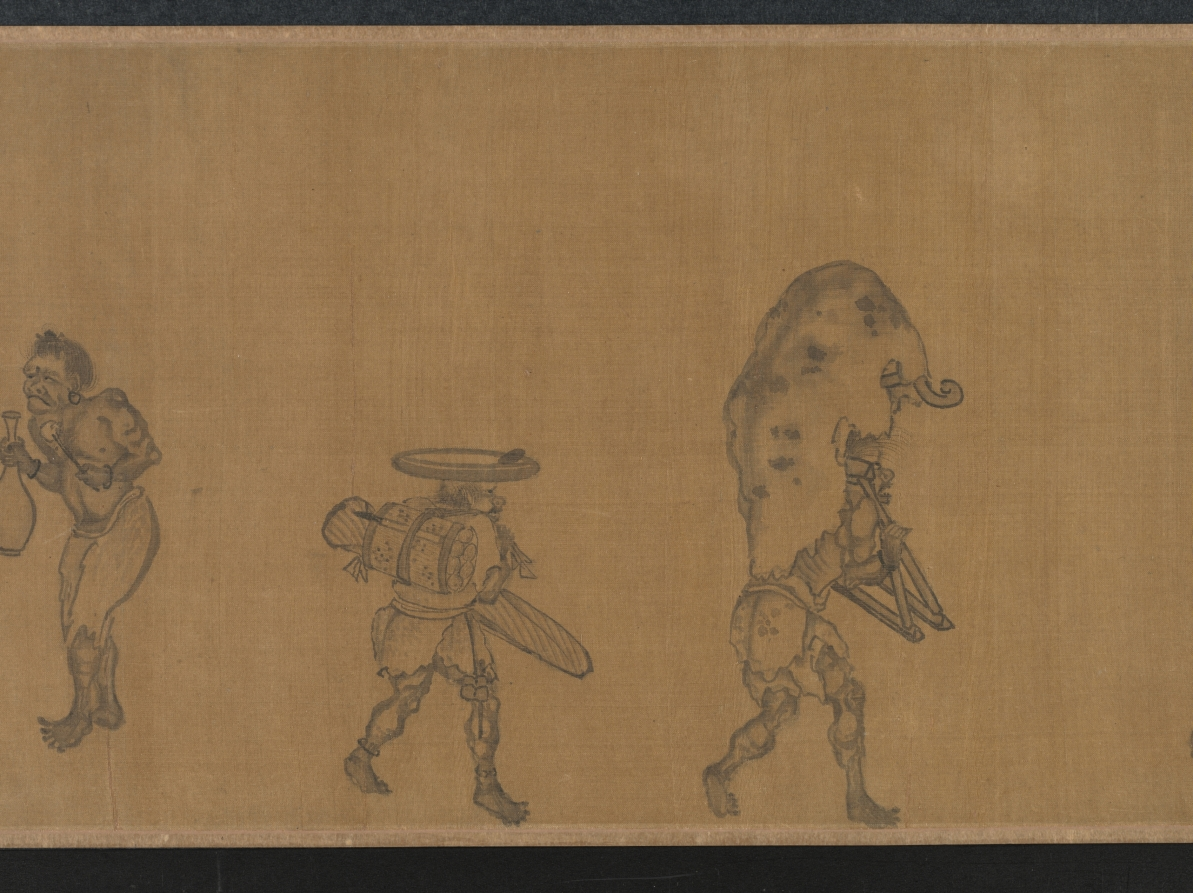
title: The Lantern Night Excursion of Zhong Kui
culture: China, Yuan dynasty (1271-1368)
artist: Yan Hui (Chinese, active 1270–1310)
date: late 1200s–early 1300s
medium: handscroll; ink and slight color on silk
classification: Painting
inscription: Artist's signature [and probable seal]: Yan Qiuyue 顏秋月 Title on frontispiece and 1 seal of Niu Shuyu 鈕樹玉 (1760–1827): Qiuyue mohuan 秋月墨幻 [Qiuyue's Ink Fantasy]. 31 additional seals: 2 of Yang Shiqi 楊士奇 (1365–1444); 2 of An Guo 安國 (1481–1534); 8 of Xiang Yuanbian 項元汴 (1525–1590); 2 of Geng Zhaozhong 耿昭忠 (1640–1686); 4 of Pu Tung 溥侗 (1870–1952); 7 of Tan Jing 譚敬 (1911–1991); 1 of Liu Ting-chih (20th c.); 5 unidentified.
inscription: An inscription by Zizhi Shanren 紫芝山人 [probably Jiang Hui 蔣惠], dated 1389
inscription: An inscription by Wu Kuan 吳寬 (1436–1504)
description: Here, the demon queller Zhong Kui leads a nightly procession of street entertainers with bare, muscular bodies and demonic faces. Some wear shabby clothes, and all perform stunts and tricks to astound and scare the viewer. In fact, a New Year custom in cities of southeast China had the poor, disguised as demons, process through the streets and play their tricks to clear households of evil spirits and welcome the spring. From right to left, a demonic figure leads the procession and beats a drum; another lifts a large rock; one stands on his hands trying to drink; one balances a jar on his elbow; three hold and wield weapons; one carries a folded chair covered by a cow’s skin; another holds Zhong Kui’s qin (zither), books, brush, and inkstone. At the end of the scroll, two figures offer a cup and bottle of wine to Zhong Kui, who lifts his hand in command.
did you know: Zhong Kui was an ancient ghostbuster.